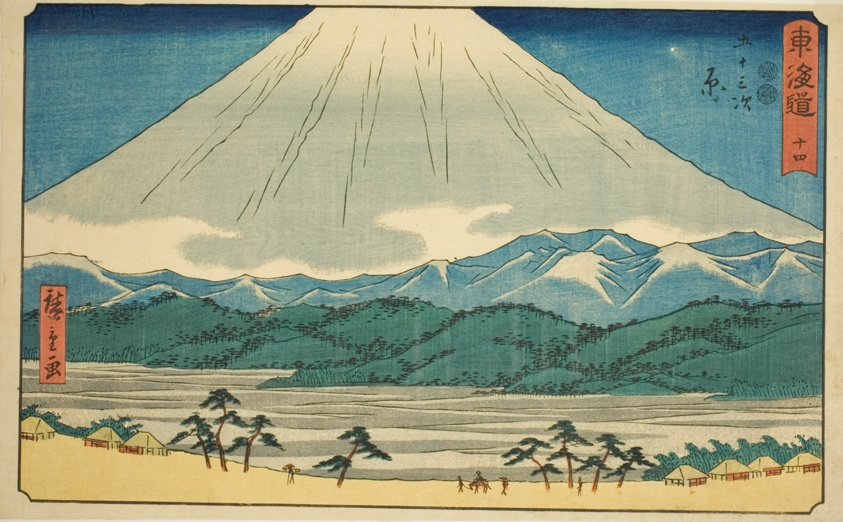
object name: Print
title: Hara—No. 14, from the series "Fifty-three Stations of the Tokaido (Tokaido gojusan tsugi)," also known as the Reisho Tokaido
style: Japanese (culture or style)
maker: Utagawa Hiroshige 歌川 広重; Japanese, 1797-1858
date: c. 1847/52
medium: Color woodblock print; oban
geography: Japan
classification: woodblock print; print; asian art